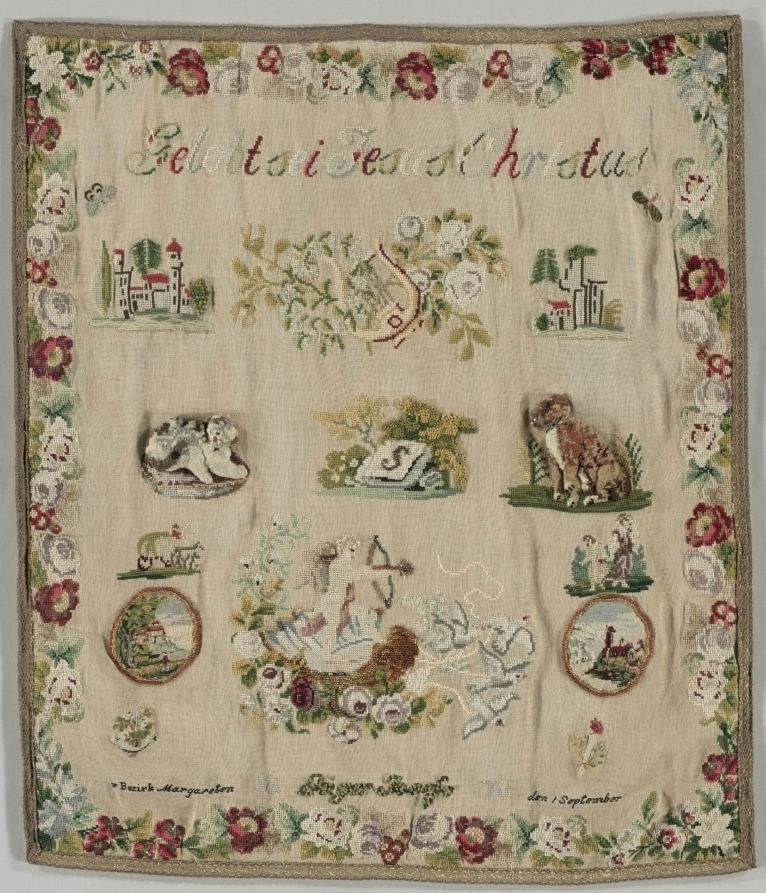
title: Sampler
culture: Germany, 19th century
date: 1870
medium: embroidery; wool on woolen canvas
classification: Sampler